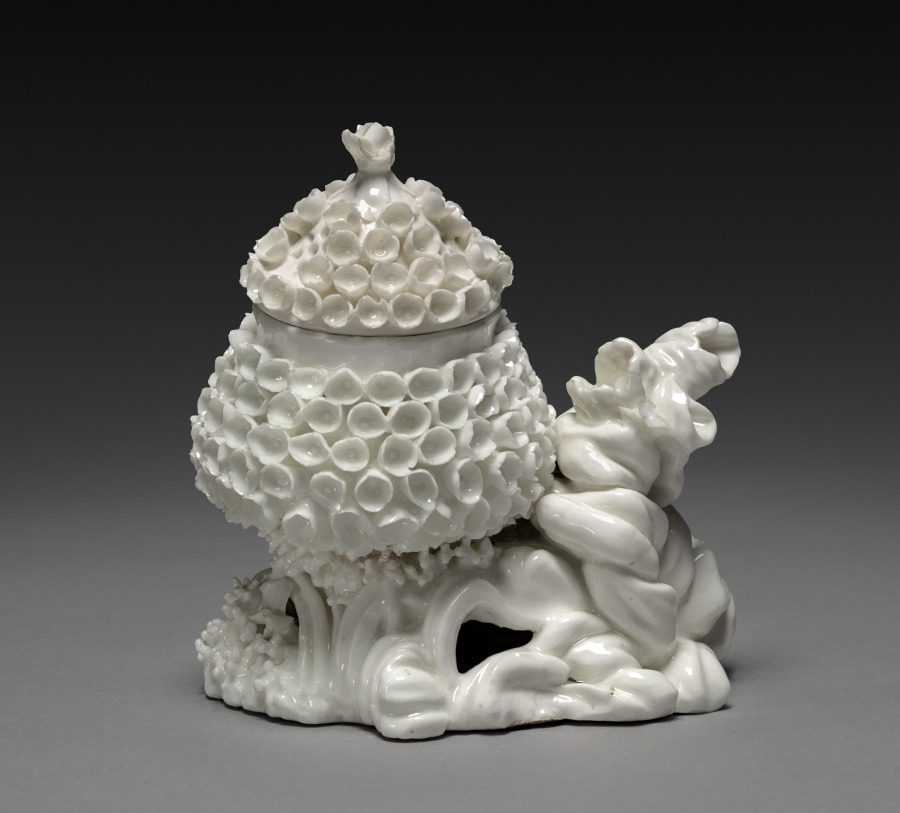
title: Potpourri Vase with Cover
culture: France, Vincennes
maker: Mennecy Factory (French)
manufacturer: Vincennes Porcelain Factory (France, 1740–56)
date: c. 1750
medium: soft-paste porcelain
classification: Ceramic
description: The delicate flowers that cover the lid and base of this vase draw inspiration from the schneeballblüten, or guelder rose, pattern produced at the German Meissen porcelain factory. The flowers on the lid are spaced by small, unobtrusive perforations that allow the scent of the potpourri, a mixture of flowers, herbs, and spices placed inside this vase, to disperse.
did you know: This style of potpourri vase, a pot atop a rockwork base, was popularly produced by major 18th-century porcelain factories including those at Vincennes, Chantilly, and Saint-Cloud.